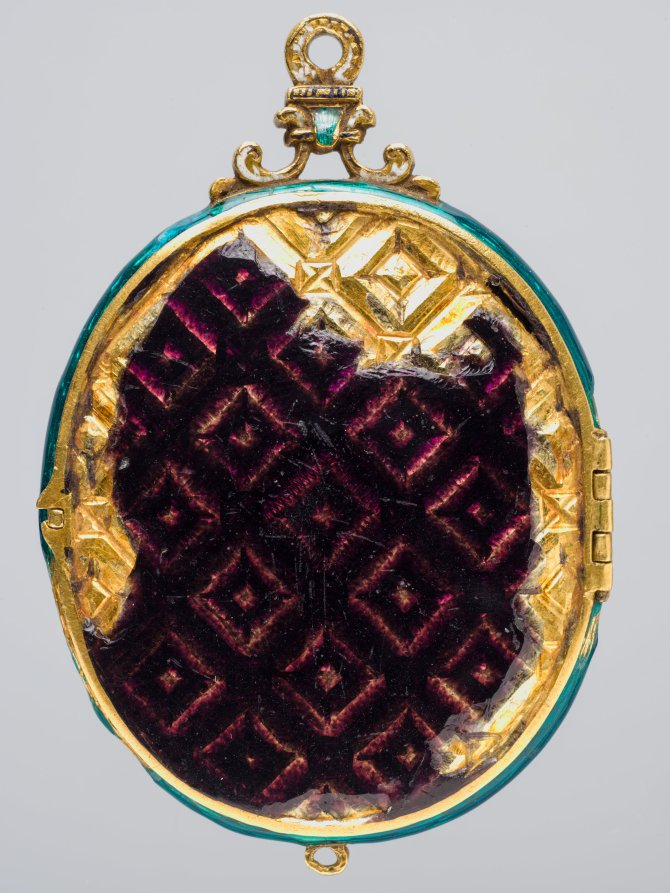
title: Portrait of a Woman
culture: England, 16th century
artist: Nicholas Hilliard (English, c. 1547–1619)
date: c. 1593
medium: watercolor on vellum in a gold and enamel locket frame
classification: Portrait Miniature